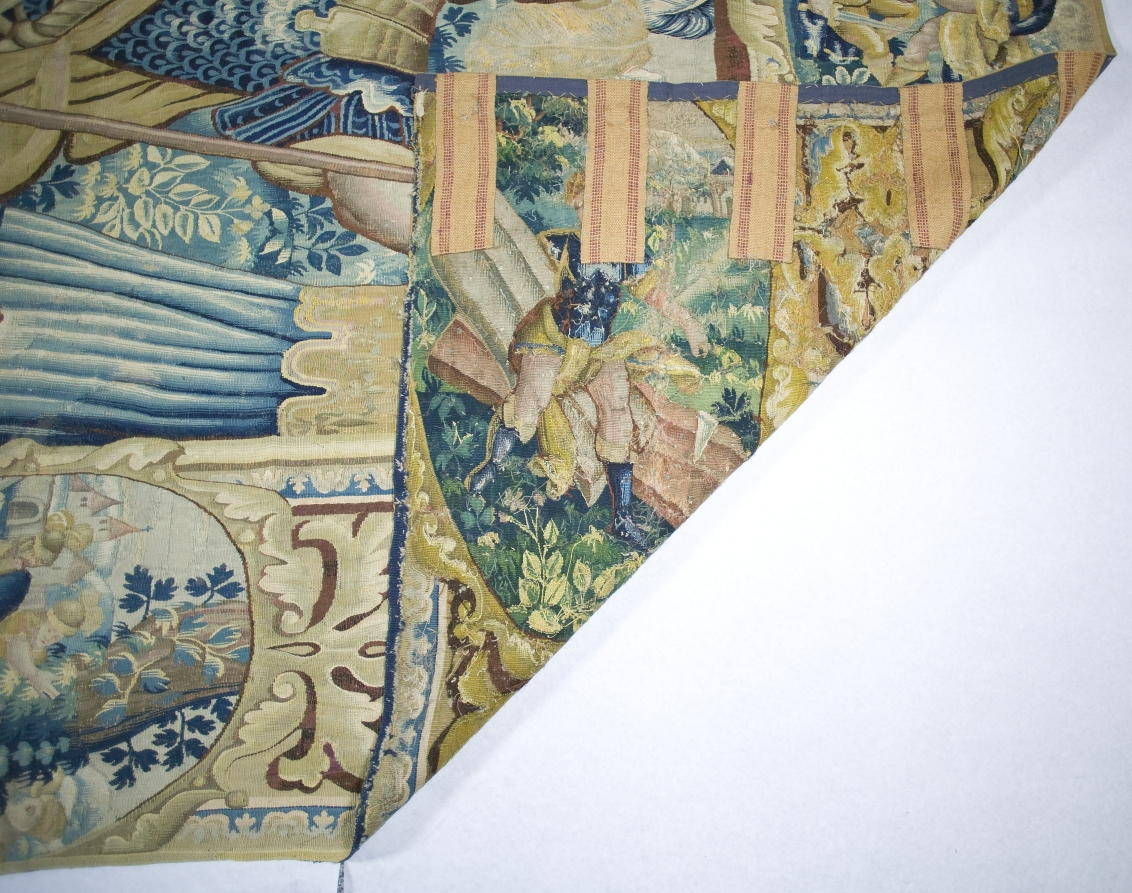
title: Gideon Selecting his Army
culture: Flanders, late 16th century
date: late 1500s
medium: tapestry weave: wool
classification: Tapestry